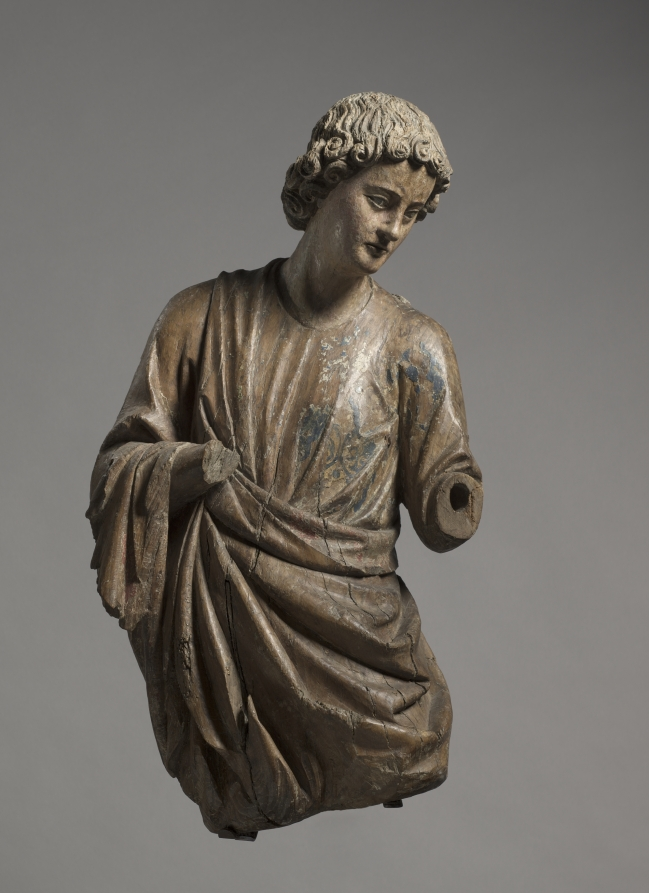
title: Angel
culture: France, vicinity of Reims, 13th century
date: c. 1250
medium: walnut with traces of gilding and polychromy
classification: Sculpture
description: Surviving in fragmentary condition, this pair of angels lacks lower arms, hands, wings, and attributes. Their original paint and gilding, now almost entirely lost, once rendered their garments a rich brocade and their hair a luxuriant gold. Nonetheless, in their graceful poses and sublime faces—which may portray tragic interest, anguish, or deep concern—their original delicacy and power are still evident. They embody the monumental style of 13th-century High Gothic cathedral sculpture in France. Their style specifically suggests they were carved in or around Reims, possibly by sculptors associated with the cathedral there. Their original placement is unknown, but they may have flanked an altar on columns.